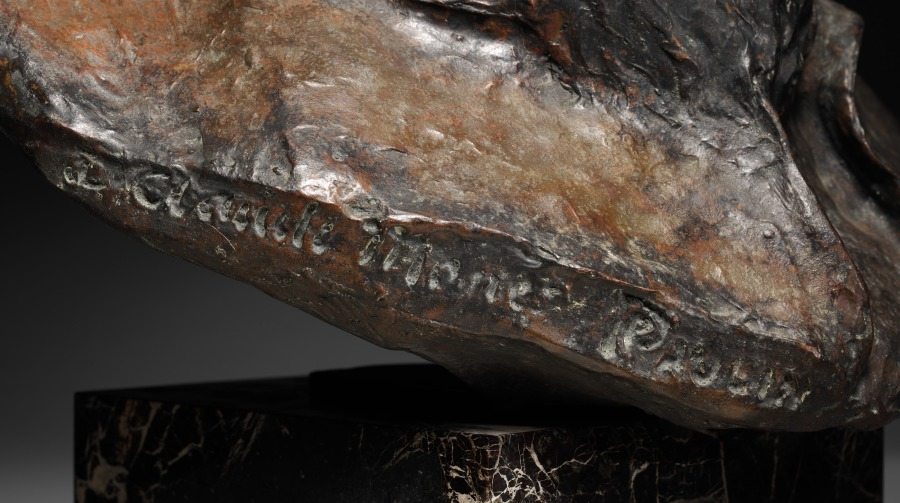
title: Claude Monet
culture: France, 20th century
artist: Paul Paulin (French, 1852–1937)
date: late 1800s-early 1900s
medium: bronze, marble base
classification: Sculpture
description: Paul Paulin was a renowned Parisian dentist who had a passion for sculpting and was encouraged by Edgar Degas to pursue an artistic career. Paulin is best known for his portrait busts of notable Impressionists. There are related versions of this portrait bust of the celebrated painter Claude Monet at three museums in Paris: the Petit Palais (plaster), the Musée d'Orsay (bronze), and the Musée Rodin (bronze).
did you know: In addition to Claude Monet, Paul Paulin also made portrait busts of Edgar Degas, August Renoir, Camille Pissarro, and Auguste Rodin.